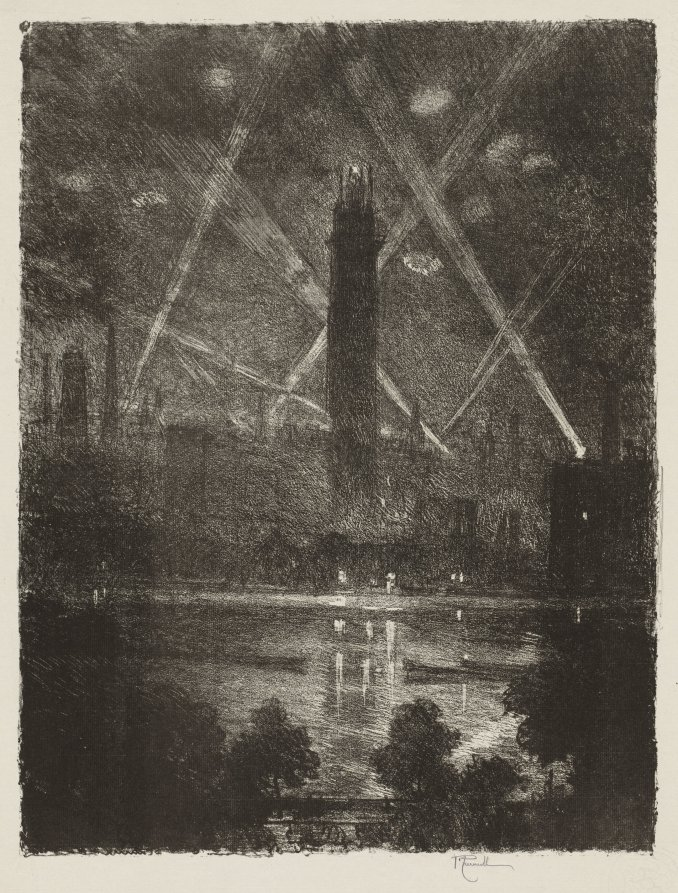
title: English War Work: Shot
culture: America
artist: Joseph Pennell (American, 1857–1926)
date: 1916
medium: lithograph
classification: Print